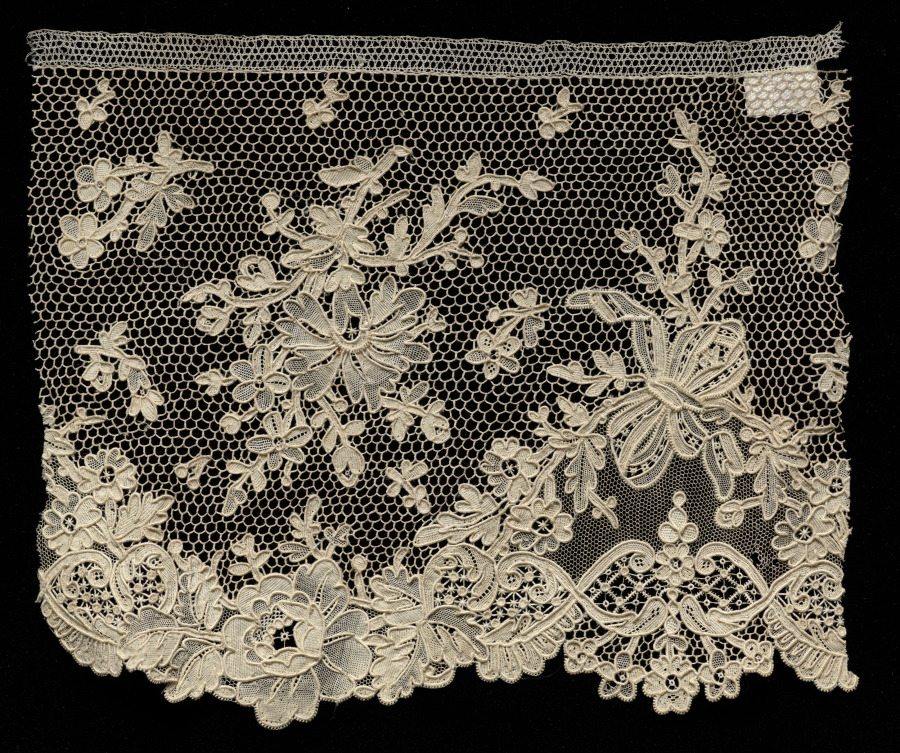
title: Lace Edging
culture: France, Argentan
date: 1900s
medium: Linen: needle lace (Argentan lace)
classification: Lace